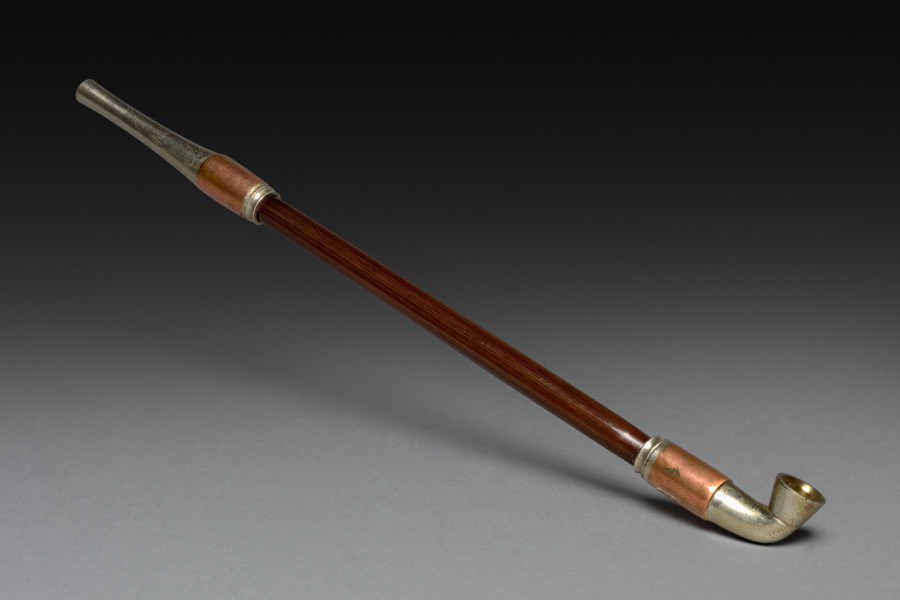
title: Tobacco Pipe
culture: Japan, Edo period (1615–1868)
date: early to mid-1800s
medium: wood, silver, brass, and copper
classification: Miscellaneous